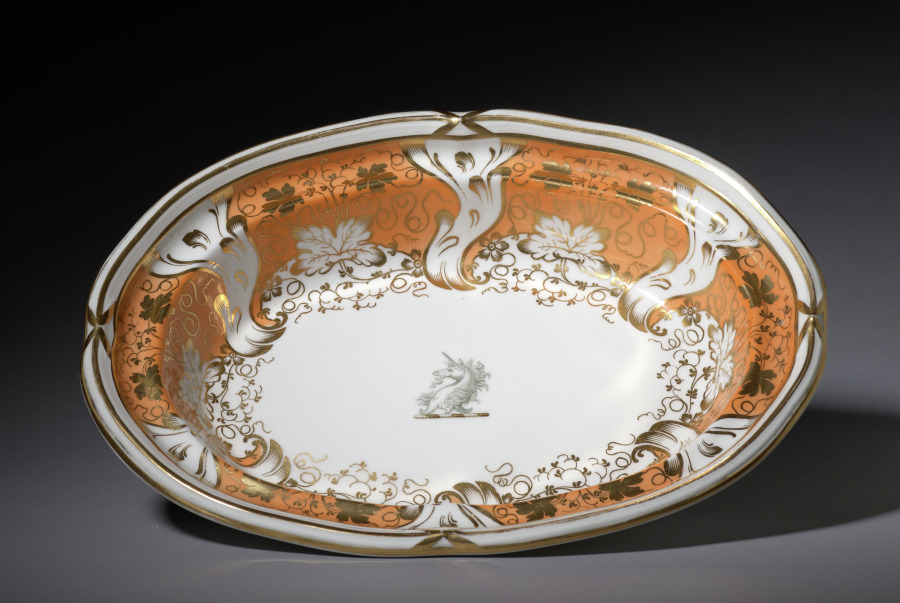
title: Vegetable Dish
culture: England, Staffordshire, early 19th century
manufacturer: Davenport Pottery and Porcelain Factory (British)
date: early 1800s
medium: ceramic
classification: Ceramic